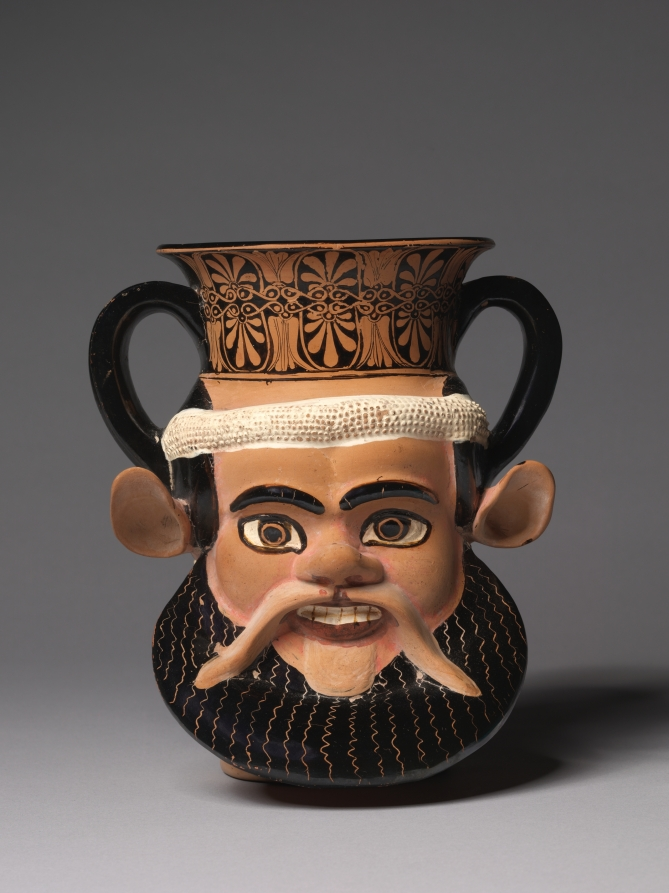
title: Red-Figure Janiform Kantharos (Two-Sided Head-Shaped Drinking Cup): Satyr and African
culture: Greek, Attic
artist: assigned to Class K (The Toronto Class)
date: c. 470–460 BCE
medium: ceramic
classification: Ceramic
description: Combining two mold-made faces beneath a pair of vertical handles and a flaring, wheel-made lip, this unusual drinking cup is a variation of the kantharos, a vessel favored by the wine god Dionysos. A snub nose and equine ears identify the satyr, a relatively common type on such vessels. The glossy black face and red hair on the other side are more unusual, apparently meant to show an older African man, with white beard and eyebrows, and wrinkles around the eyes.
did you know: This janiform kantharos is unique in juxtaposing heads of a satyr and an African man.